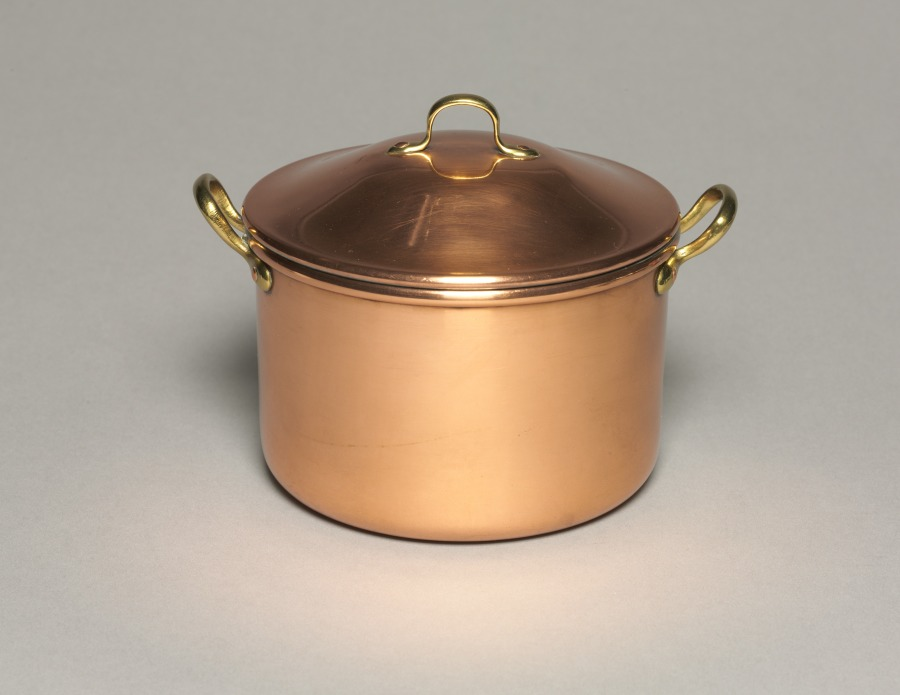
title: Covered Pot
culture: Russia, St. Petersburg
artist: firm of Peter Carl Fabergé (Russian, 1846–1920)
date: 1914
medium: copper with brass handles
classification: Metalwork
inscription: Inscribed: Double-headed eagle; C.FABERGE (in Cyrillic); War (in Cyrillic), 1914r.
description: As Russia entered the First World War, austerity and economy settled into the fabric of life even among wealthy aristocrats and nobility. Not only were precious materials such as gold, silver, and gemstones hard to procure, but such luxury seemed out of place when so many men were dying at the front. Fabergé contributed to the war effort by making shells, casings, and other munitions out of brass and copper. He also made cookware, such as this small soup pot, to be sent to the front lines with provisions tucked inside. However, these simple forms only looked affordable. They were still a luxury only the wealthiest families could afford to send to their sons.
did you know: This copper soup pot was sent to the front lines filled with provisions during the First World War.